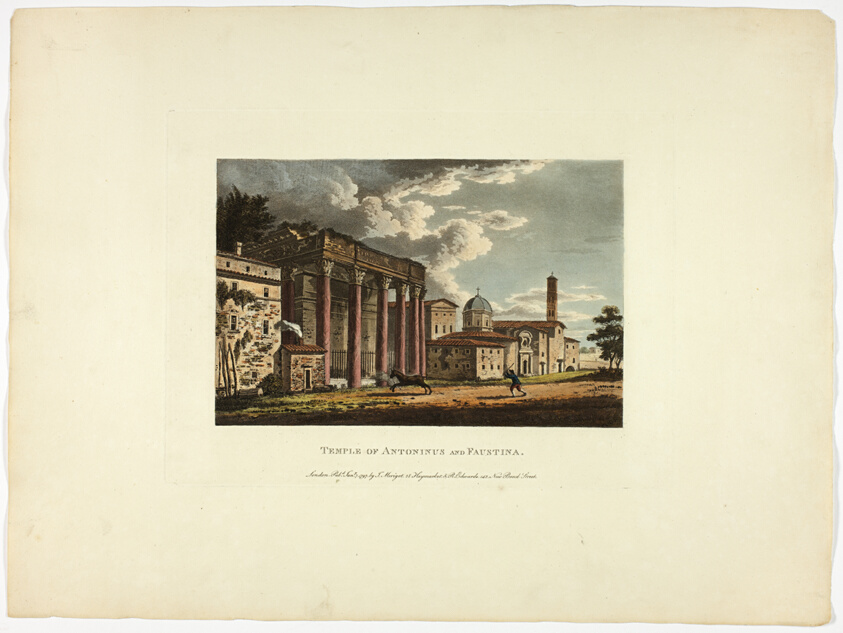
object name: Print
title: Temple of Antoninus and Faustina, plate thirty-six from the Ruins of Rome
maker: M. Dubourg, (English, active 1786-1838); published by J. Merigot (Italian, Unknown)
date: published January 7, 1797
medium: Hand-colored aquatint on paper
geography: England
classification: aquatint; print; prints and drawing